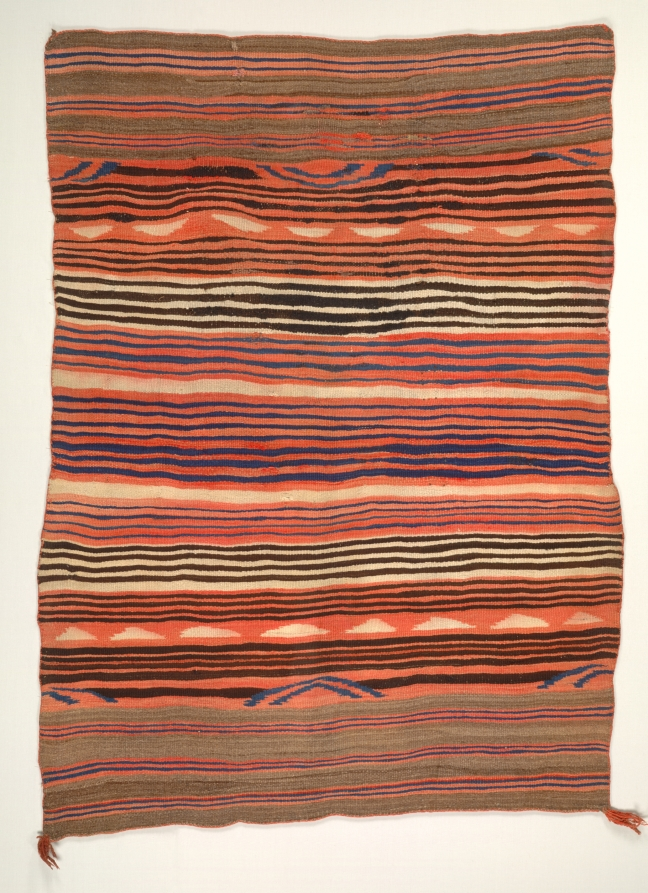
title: Banded Wearing Blanket (Diyugi)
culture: America, Native North American, Southwest, Diné (Navajo) or Zuni Pueblo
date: c. 1880–90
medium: Wool (handspun and bayeta): tapestry weave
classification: Textile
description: This blanket was created during the late 1800s, when weavers in the Southwest began to shift from making garments for Indigenous use, including trade, to additionally create items for non-Native collectors. In this new market, traditional wearing blankets, which were worn around the shoulders, were marketed as rugs.